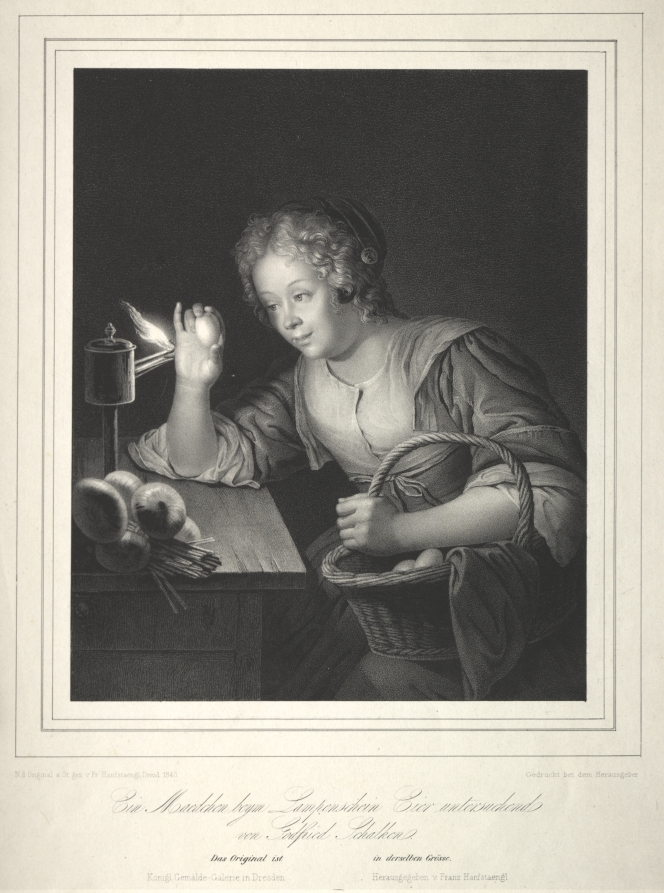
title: Girl Candling Eggs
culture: Germany, 19th century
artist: Franz Seraph Hanfstaengl (German, 1804–1877)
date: 1840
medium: lithograph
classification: Print